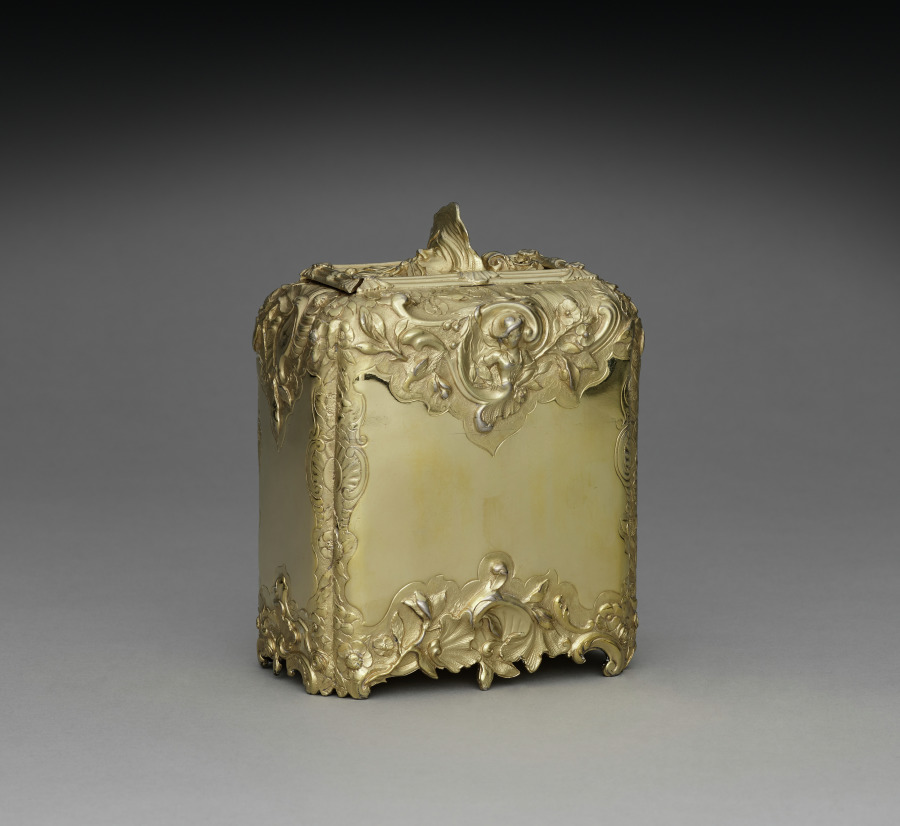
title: Tea Caddy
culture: England, London, 18th century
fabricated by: Paul Jacques de Lamerie (British, 1688–1751)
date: 1741–1742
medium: silver gilt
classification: Silver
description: In the 1600s and 1700s, silver played a significant role in projecting wealth, status, power, and ritual in British life. Tea was likewise a highly valued commodity, and as such, silver caddies like this one were designed to display the social distinction of its owner. This canister’s prominently sloping shoulders were designed by Paul Jacques de Lamerie in the early 1730s and became a standard form for tea caddies by the end of the decade.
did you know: The curving shape of this tea caddy is echoed by the scrolling lines and swirling naturalistic ornament on all four sides.